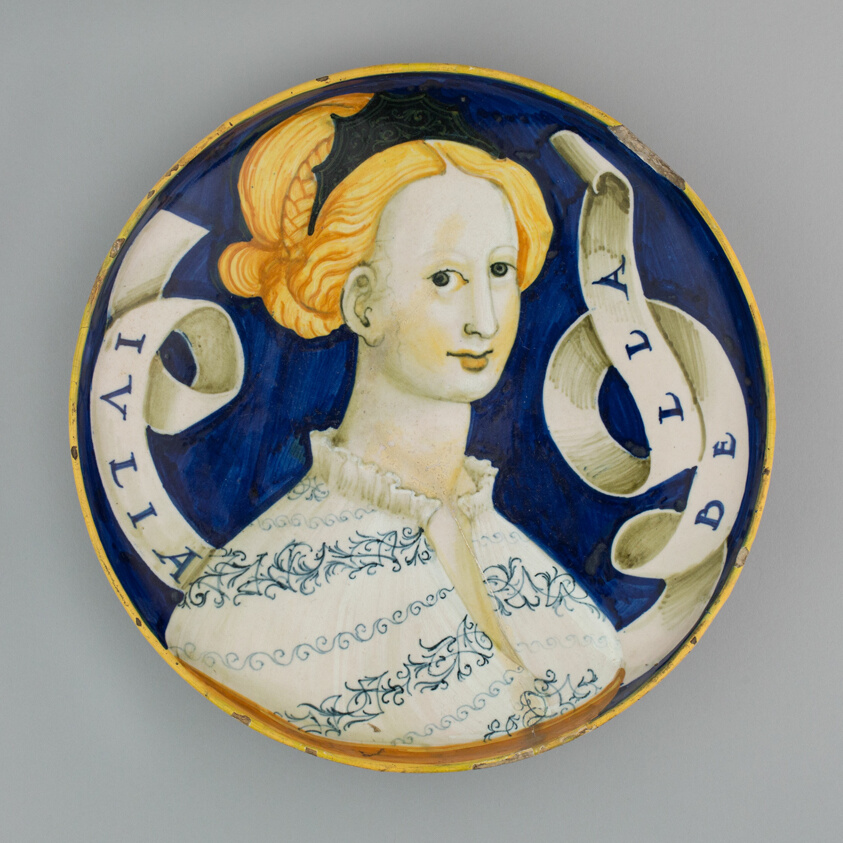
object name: Ceramics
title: Dish (Coppa Amatoria)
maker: Italian; Urbino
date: 1530/45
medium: Tin-glazed earthenware (maiolica)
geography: Italy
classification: ceramics; european decorative arts; decorative arts